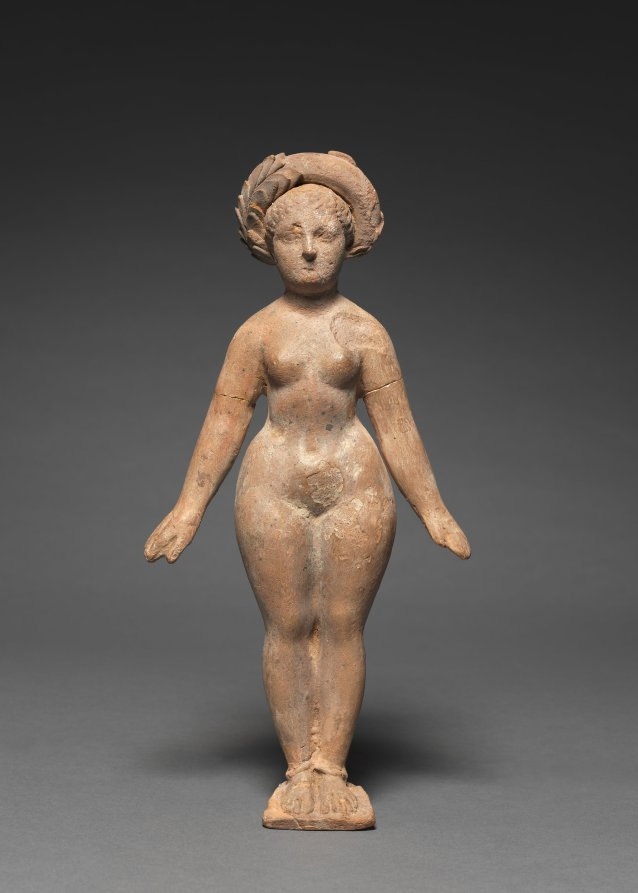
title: Fertility Goddess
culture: Pakistan, Gandhara, reportedly Charsada, early Kushan period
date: 100s CE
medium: terracotta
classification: Sculpture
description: Female figures fashioned from terracotta were found at large man-made pools of water in early Buddhist sacred compounds. They indicate the importance of art and rites associated with fertility and childbirth among the Buddhist laity, of which women were a major component. The wreath, small breasts, and gentle modeling of her full-hipped body associate this figure with Greco-Roman imagery.